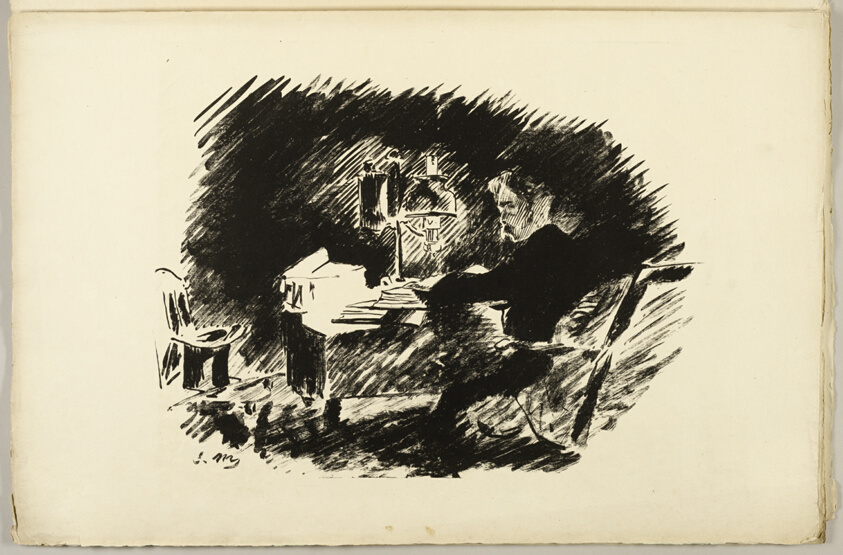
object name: Print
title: Under the Lamp ("Once upon a midnight dreary..."), from The Raven (Le Corbeau)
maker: Édouard Manet (French, 1832-1883); written by Edgar Allan Poe (American, 1809-1849); translated and produced by Stéphane Mallarmé (French, 1842-1898); printed by Lefman et Cie. (French, 19th century); published by Richard Lesclide (French, 1825-1892)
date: 1875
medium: Transfer lithograph in black on cream laid paper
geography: France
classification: lithograph; paper; print; prints and drawing